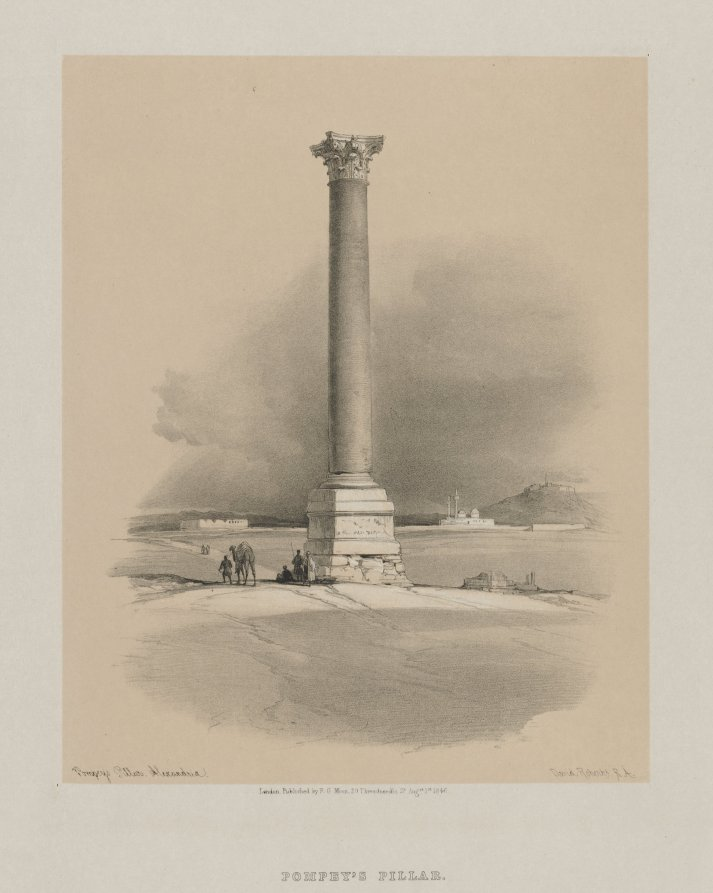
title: Egypt and Nubia, Volume I: Pompey's Pillar, Alexandria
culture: England, 19th century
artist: Louis Haghe (British, 1806–1885)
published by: F. G. Moon, 20 Threadneedle Street, London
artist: after David Roberts (Scottish, 1796–1864)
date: 1846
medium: color lithograph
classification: Print